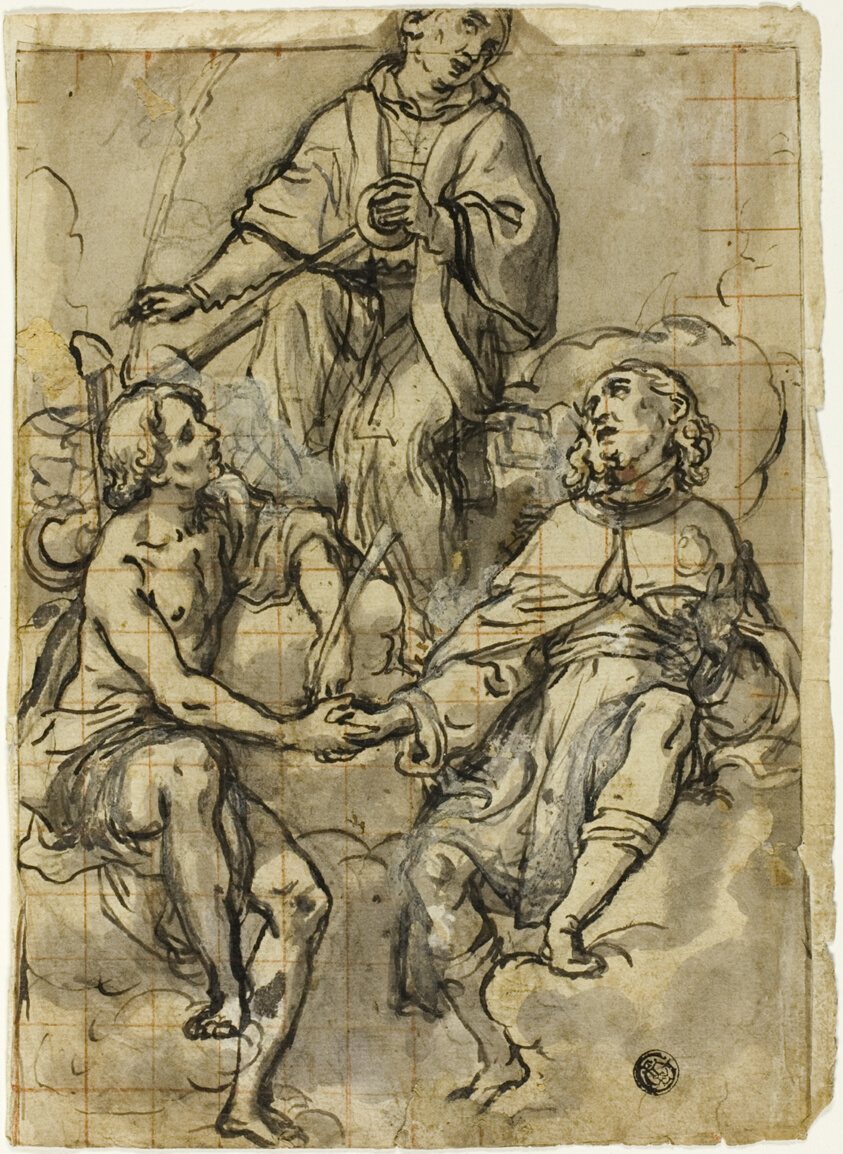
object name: Drawing and Watercolor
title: Saint Clement Flanked by Saints Sebastian and Roch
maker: Andrea Lilli, called Lilio; Italian, c.1570-after 1630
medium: Pen and black ink with brush and gray wash, over touches of black chalk, heightened with lead white (oxidized), on cream laid paper, squared in red chalk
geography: Italy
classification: ink with wash; drawings (visual works); prints and drawing